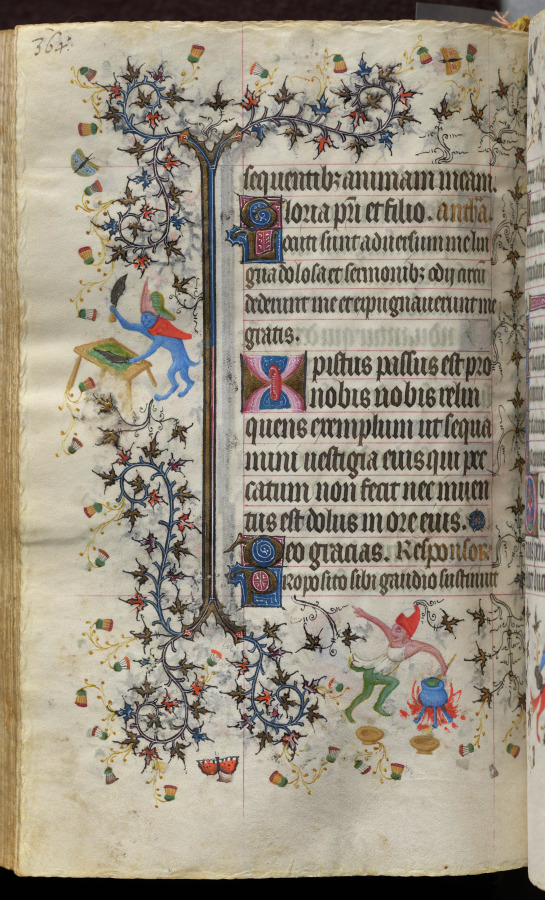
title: Hours of Charles the Noble, King of Navarre (1361-1425): fol. 177v, Text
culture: France, Paris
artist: Master of the Brussels Initials and Associates (French)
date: c. 1405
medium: ink, tempera, and gold on vellum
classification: Bound Volume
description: This precious volume was obviously highly prized by its owner, the French-born King of Navarre, who had his coat of arms painted on no less than twenty folios. Rather than directly commissioning this manuscript from a specific workshop, it seems that Charles the Noble acquired his book of hours -- perhaps ready-made for the luxury market -- while on a trip to Paris in 1404-05. A collaborative effort, six painting styles are evidenced within the pages of this codex, those of two Italians, two Frenchmen, and two Netherlanders. The painter who was responsible for the planning and decoration of the book, and who produced seventeen of the large miniatures, was a Bolognese artist known as the Master of the Brussels Initials. His principal assistant, responsible for most of the borders, was a Florentine who signed his name "Zecho" da Firenze on folio 208 verso.